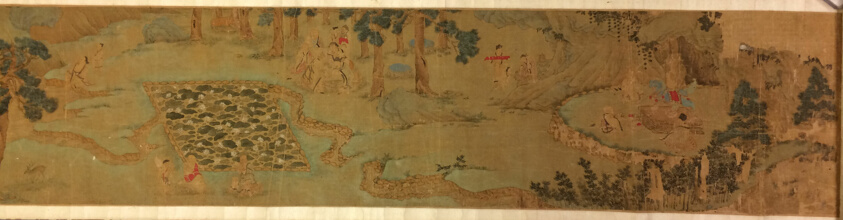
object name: Painting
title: The Eighteen Sages of the Lotus Society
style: Chinese (culture or style)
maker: Artist unknown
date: Qing dynasty (1644–1911), 18th–19th century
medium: Handscroll; ink and color on silk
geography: China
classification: handscroll; painting; asian art